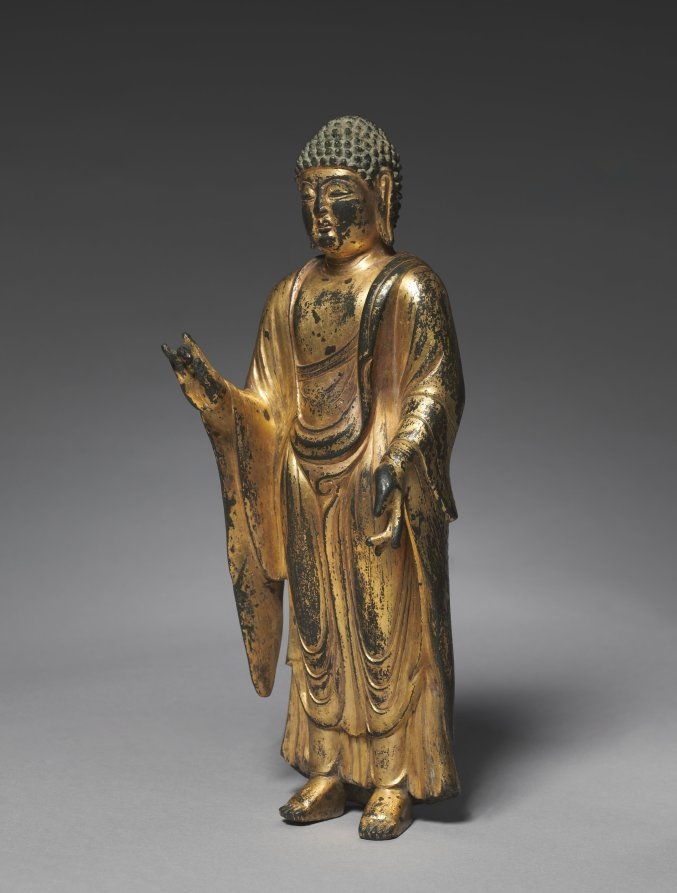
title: Standing Amitabha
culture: Korea, Unified Silla period (676-935)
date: 800s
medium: gilt bronze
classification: Sculpture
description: Buddhist teachings emphasize the pursuit of spirituality, rather than physicality, to achieve enlightenment. This statue’s artist, however, made genuine efforts to represent the divine’s beautiful voluminous body. Inspired by Indian Gupta period art (300s–500s CE), this particular artistic style emphasizing soft modeling and naturalism was further developed in China and flourished across East Asia.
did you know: This Korean statue has a stylistic affinity with statues from the Indian Gupta period (300s–500s CE) that emphasize soft modeling and naturalism.